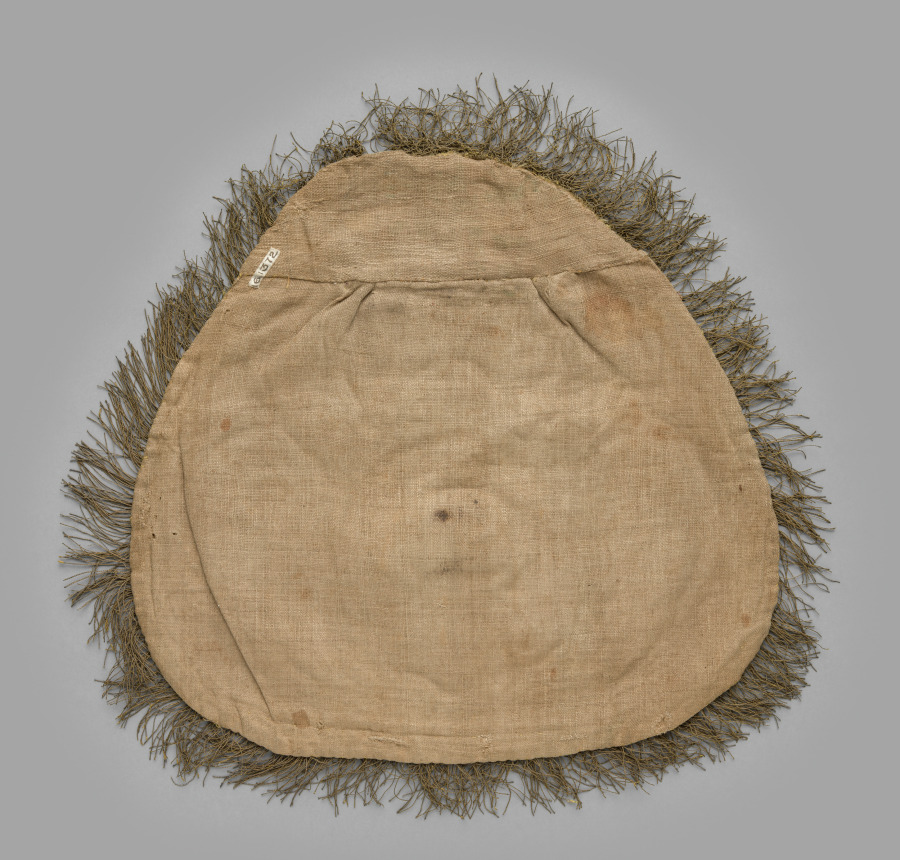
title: Gold Embroidered Pistol Cover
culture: Spain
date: 1700s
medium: embroidery; gold metallic thread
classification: Embroidery